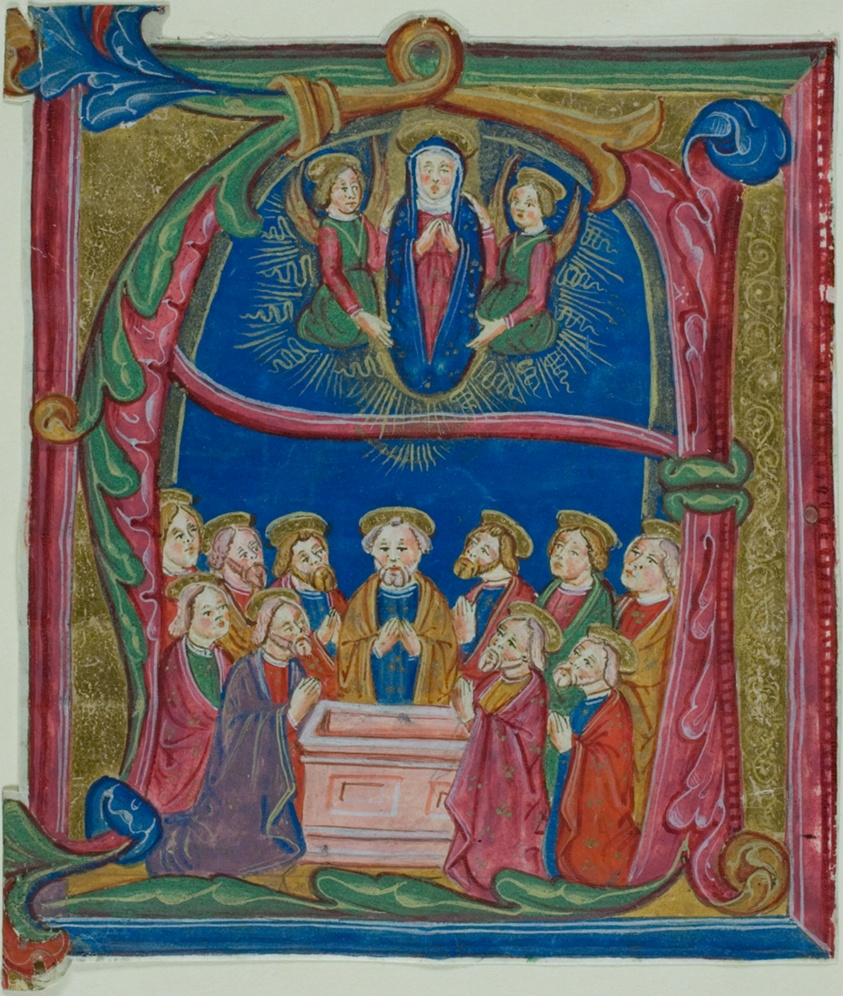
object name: Drawing and Watercolor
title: The Assumption of the Virgin in a Historiated Initial "A" from an Antiphonary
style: medieval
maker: Italian (Lombardy)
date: 15th century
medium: Manuscript cutting in tempera and gold leaf on parchment, with gothica textura inscriptions in brownish-black ink, ruled in red, verso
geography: Italy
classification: tempera; manuscript; drawings (visual works); prints and drawing